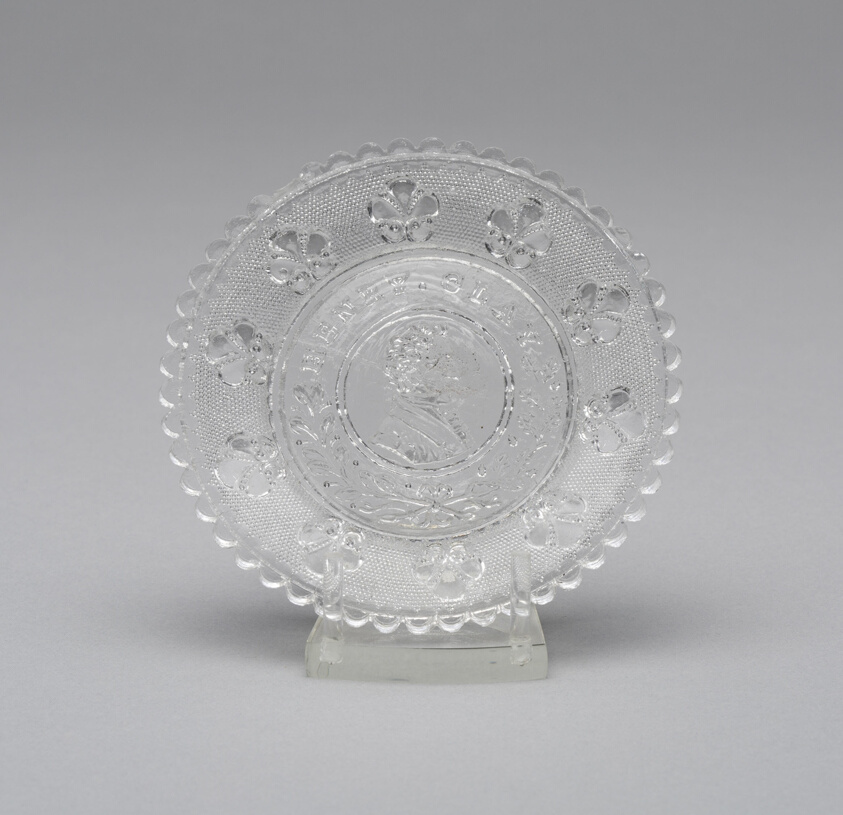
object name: Glass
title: Cup plate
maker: Artist unknown (American, 19th century); Sandwich, Massachusetts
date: c. 1835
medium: Pressed glass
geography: Sandwich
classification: plate (general, dish); glass; american decorative arts; american arts; decorative arts